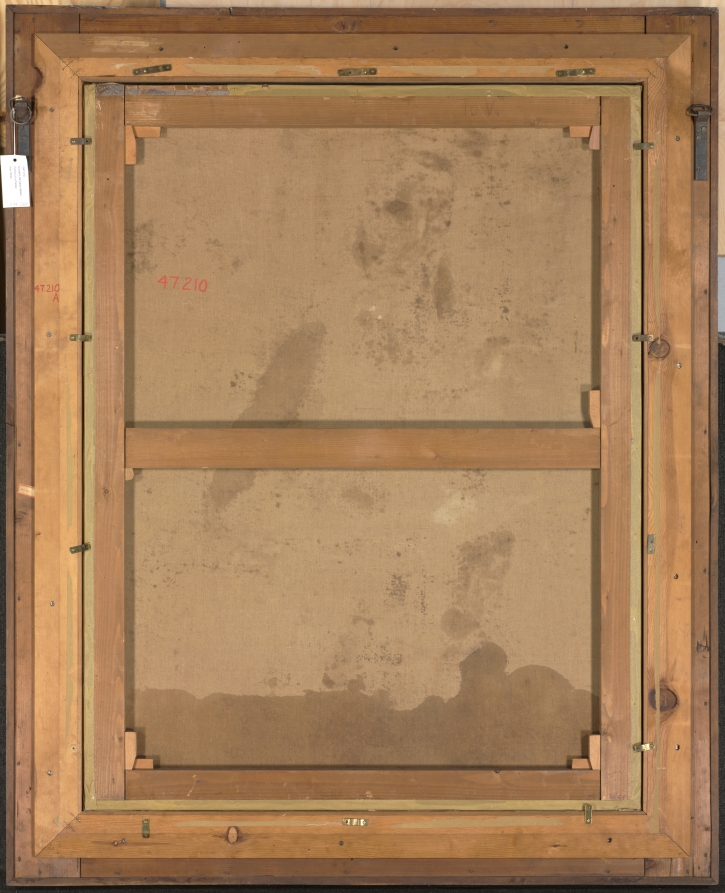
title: Portrait of a Prelate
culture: Italy, 16th century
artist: Girolamo da Carpi (Italian, c. 1501–1556)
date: mid-1500s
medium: oil on canvas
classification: Painting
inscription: Inscription on book: MUNDOS LIBENTER ASPICIT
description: Girolamo da Carpi, a court artist from Ferrara, was influenced by the grace and intellectual artificiality found in Italian Mannerist art, seen in the flowing S-curve of the sitter's clothing and his delicate and attenuated fingers. The sitter's dress identifies him as a prelate, a high-ranking member of the Catholic clergy. His costume includes a dark mantel with red lining over a gauzy, white rochet and the three-cornered hat, called a biretta. In his right hand he holds a book whose cover displays an elephant, standing in water, looking at the moon. This motif symbolized purity, and the sitter's virtue is further emphasized through the book's inscription, MUNDOS LIBENTER ASPICIT, which means, "The moon beholds the pure with pleasure." While several noble Renaissance households used this design for their family emblems, none have yet proven related to the prelate in this painting and so his identity remains unknown.